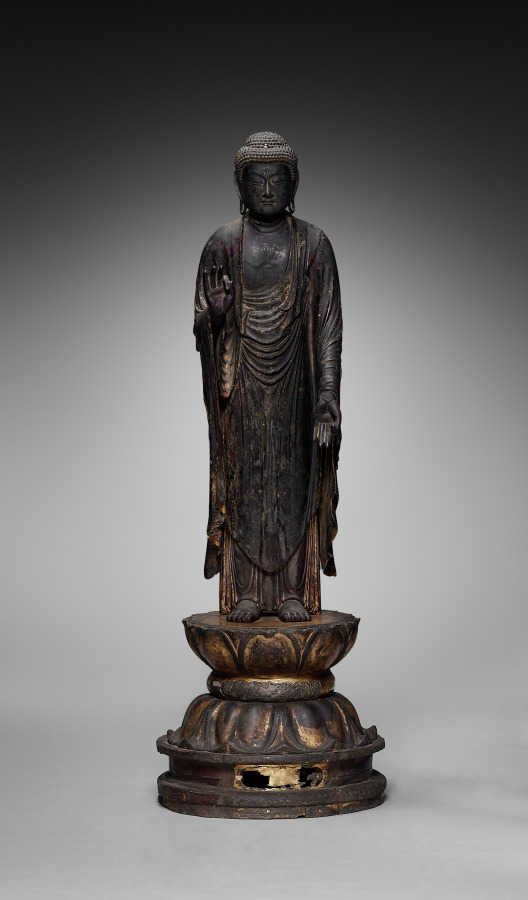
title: Amida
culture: Japan, Kamakura period (1185–1333)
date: 1200s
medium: Wood with lacquer and gilding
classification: Sculpture